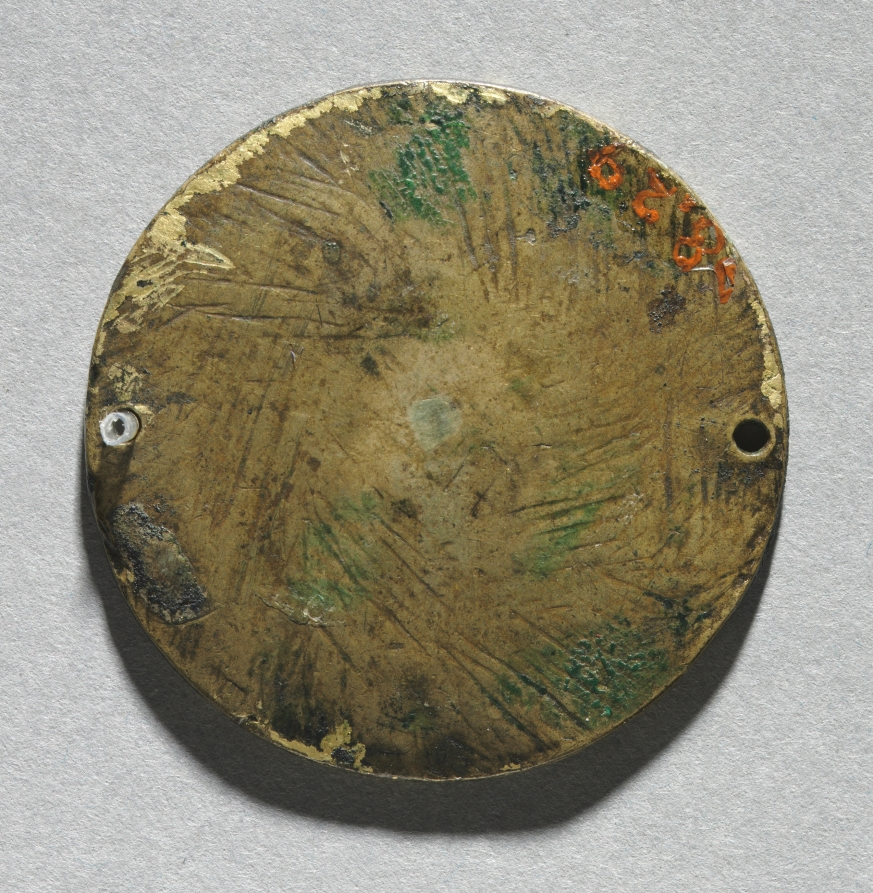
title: Allegory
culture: possibly Northern Italy, 16th century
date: possibly early 1500s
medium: gilt bronze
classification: Sculpture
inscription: on right, a twisted banderole inscribed: I T E.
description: This object might have graced a man’s hat or the handle of a sword. The allegory has yet to be deciphered, but the heroic male nude chained in flames probably addresses masculine virtues of strength or stoicism.